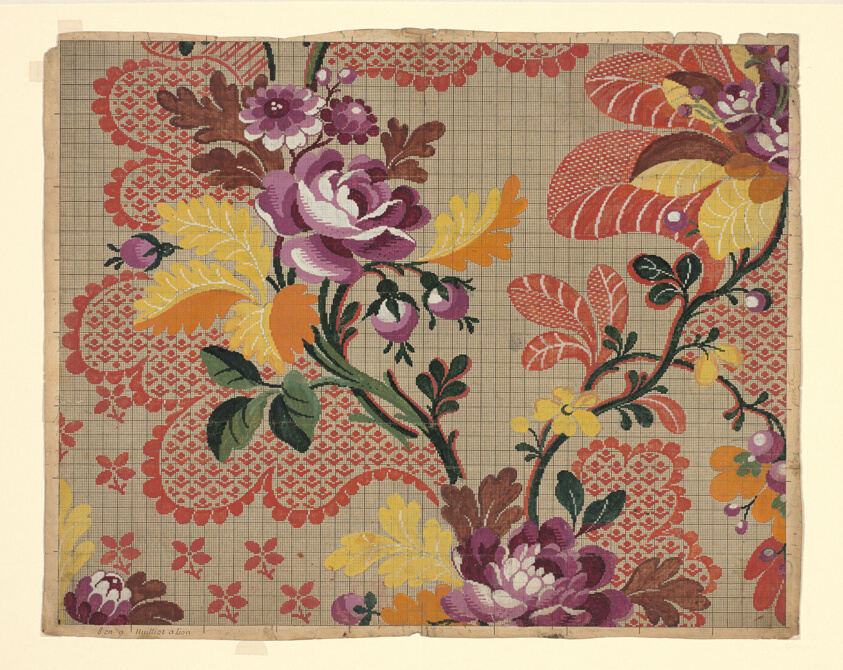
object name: Drawing and Watercolor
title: Mise-en-Carte (Point-Paper)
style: 18th Century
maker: Designed for Nicolas Guerin et Ce. (French, active 1760s–70s); Lyon, France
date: 1760s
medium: Opaque watercolor with traces of graphite over an etching in black ink on cream laid paper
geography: Lyon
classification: design; accessory - paper design; watercolor; etching; garment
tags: flowers, foliage, grids